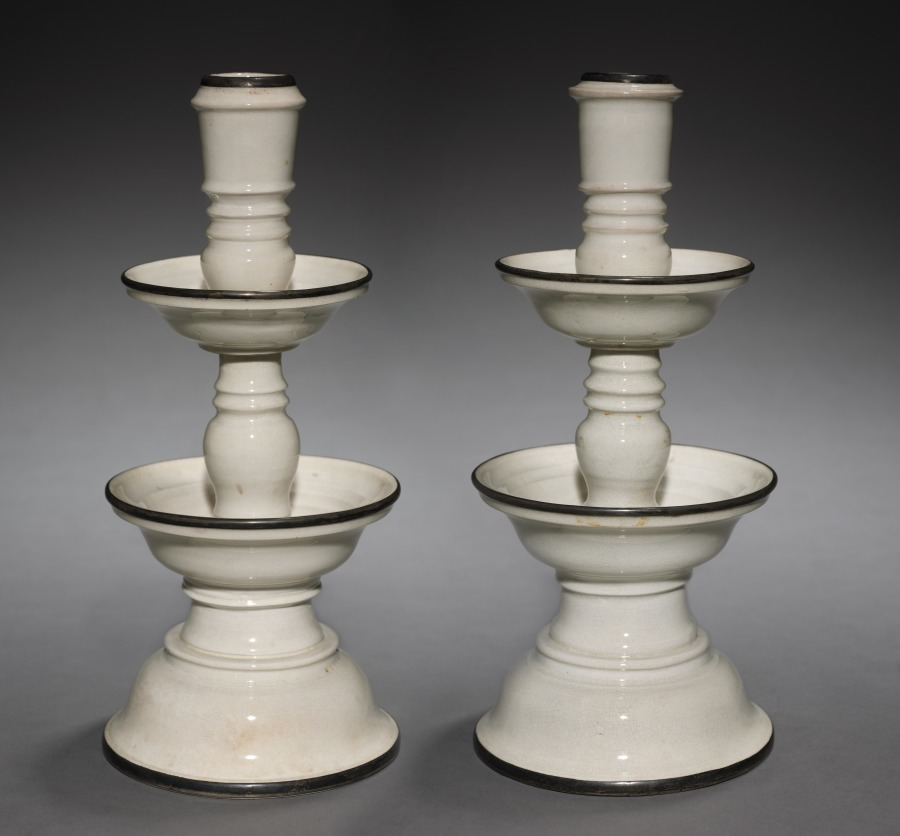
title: Candlesticks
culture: China, Ming dynasty (1368–1644)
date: 1600s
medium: glazed porcelain with metal rims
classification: Ceramic